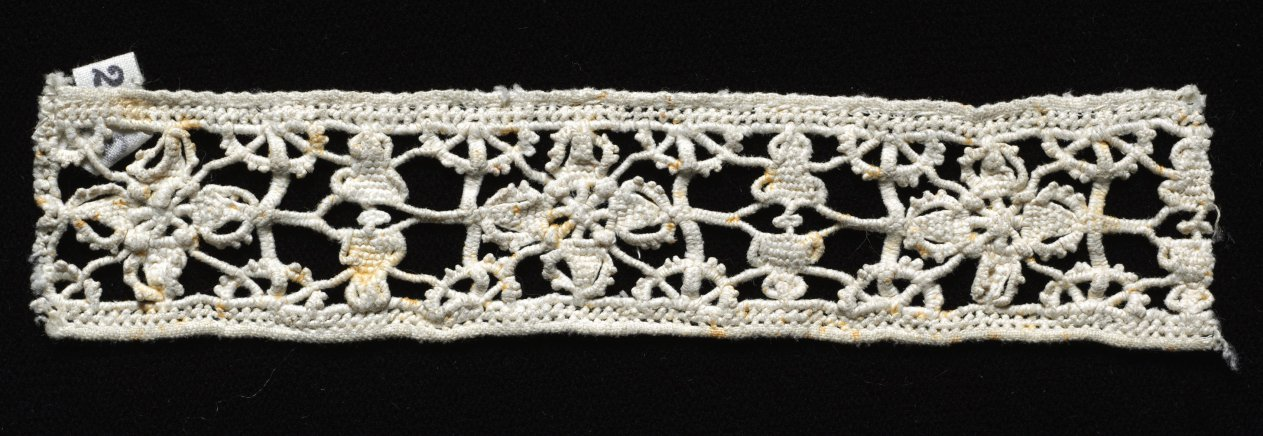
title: Lace Fragment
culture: Italy, Venice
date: 1500s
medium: Linen: needle lace, reticella insertion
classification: Lace